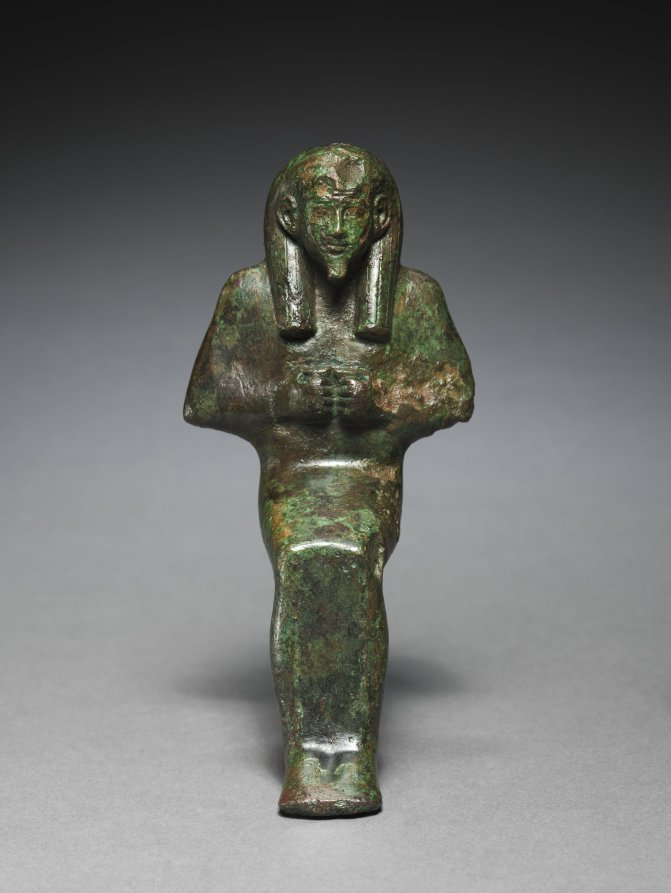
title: Statuette of Seated God, probably Osiris-lah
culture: Egypt, Late period (715–332 BCE), Dynasty 26 or later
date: 664–525 BCE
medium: bronze, solid cast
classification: Sculpture